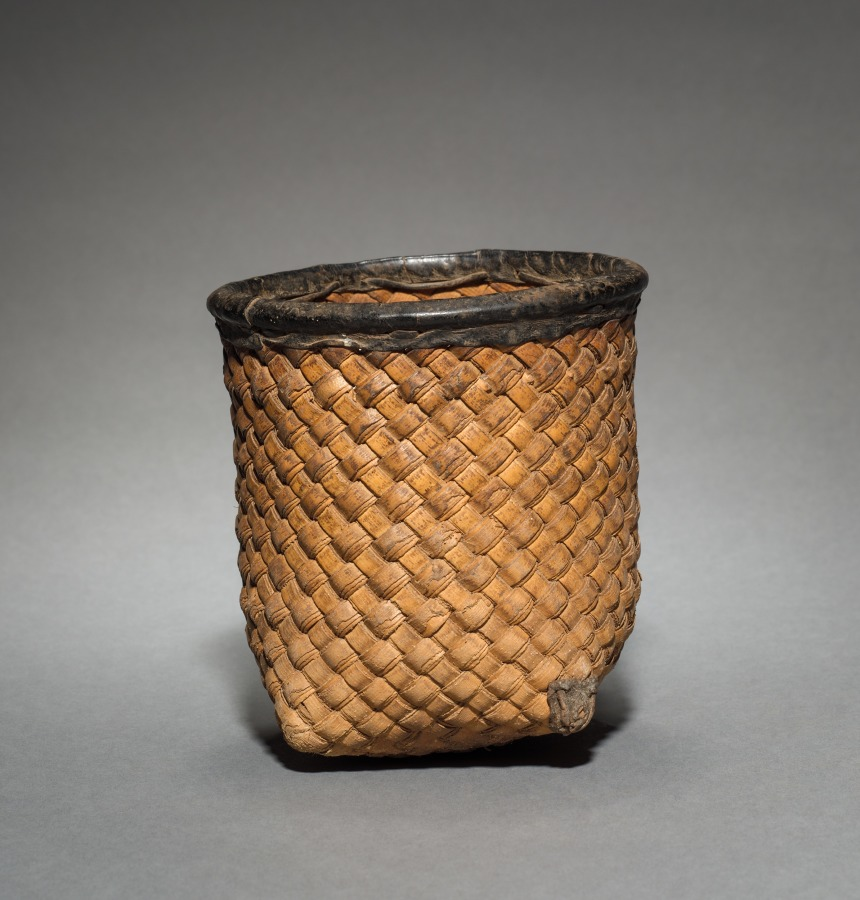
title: One of Ten Nesting Wedding Baskets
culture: Africa, Western Sudan, Burkina Faso, Lobi, 20th century (?)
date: c 1900s ?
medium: Plant fiber and leather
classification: Vessels